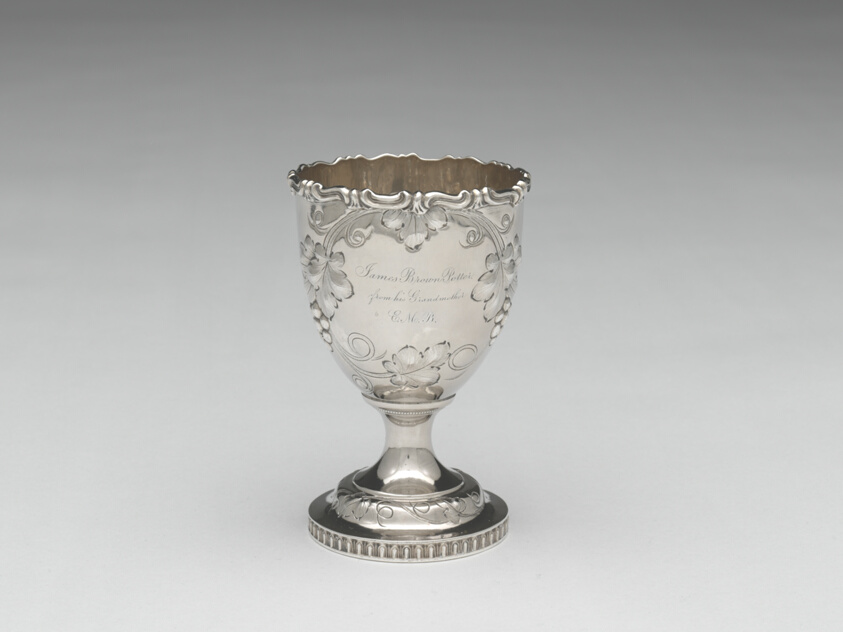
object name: Metalwork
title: Goblet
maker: William Gale & Son (American, 1850–58; 1862–66); New York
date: 1852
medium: Silver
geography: New York City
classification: drinking vessel; silver; american decorative arts; american arts; decorative arts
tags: dining, drinking